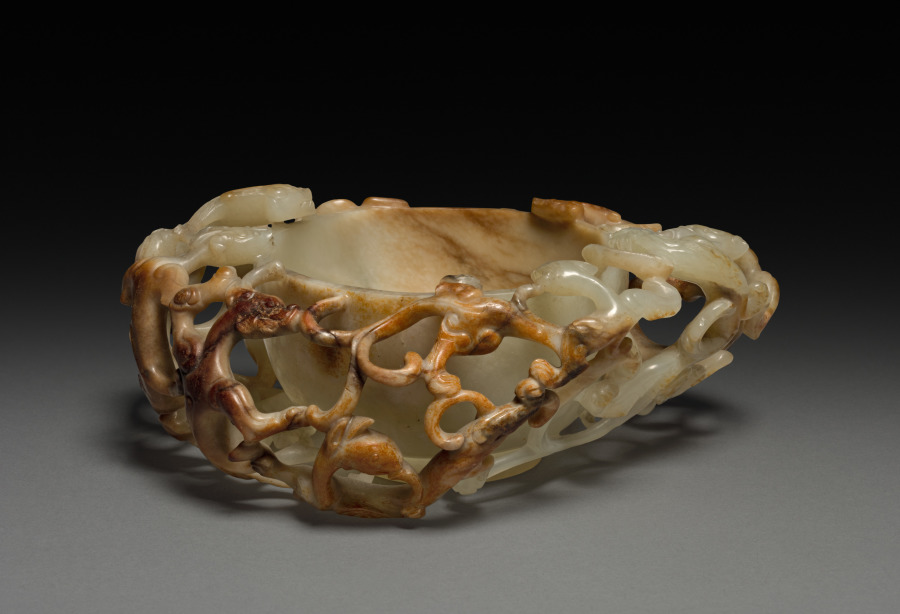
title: Cup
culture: China, Qing dynasty (1644–1911), Qianlong reign (1736–95)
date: 1736–95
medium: jade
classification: Jade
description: In the Qing dynasty, luxury items became more affordable to larger parts of the society, including women, merchants, and literati in nonofficial positions. Imperial patronage and a growing urban population also encouraged consumption of luxury goods and local craftmanship. This cup with open-work interlacing dragons shows the creative mind of the skilled artisan who carved it from a round piece of jade.